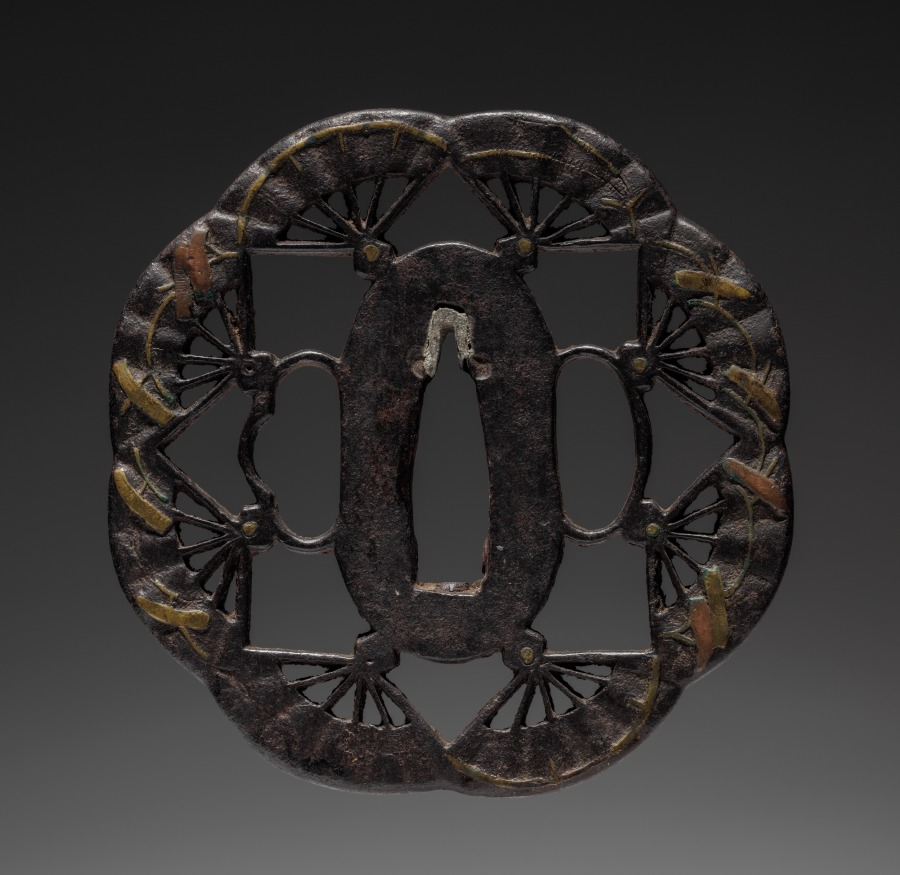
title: Sword Guard (Tsuba) with Fans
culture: Japan, possibly Edo period (1615-1868)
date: c. 1615–1868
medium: iron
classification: Arms and Armor